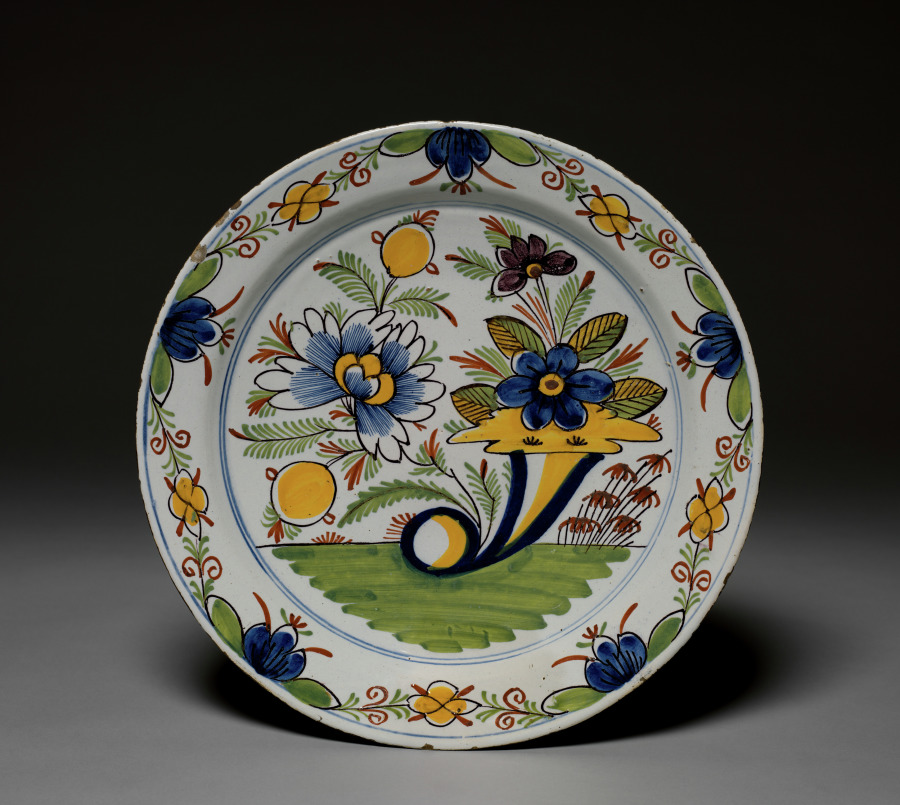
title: Polychrome Charger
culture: Netherlands, Holland, Delft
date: 1700s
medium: tin-glazed earthenware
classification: Ceramic